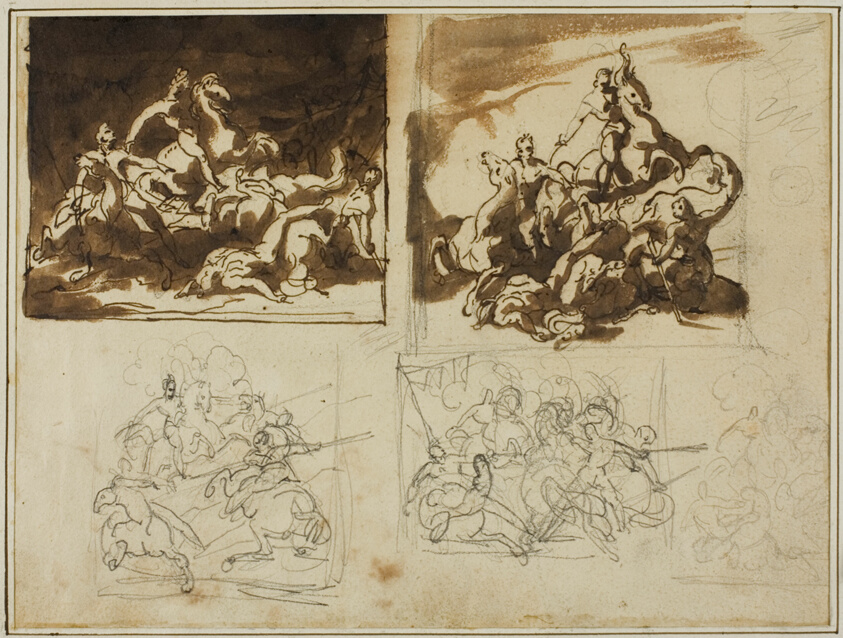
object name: Drawing and Watercolor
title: Five Sketches for a Cavalry Battle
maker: Jean Louis André Théodore Géricault (French, 1791-1824)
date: 1813/14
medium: Pen and brown ink with brush and brown wash, over graphite, on cream wove paper, perimeter mounted on ivory laid paper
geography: France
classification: pen and ink drawings; drawings (visual works); prints and drawing